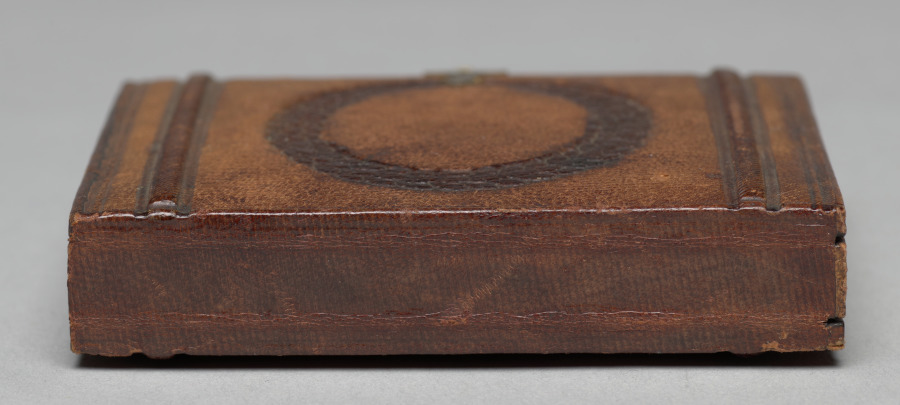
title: Seated boy in tasseled cap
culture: America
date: c. 1858–61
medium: ambrotype, sixth plate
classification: Photograph